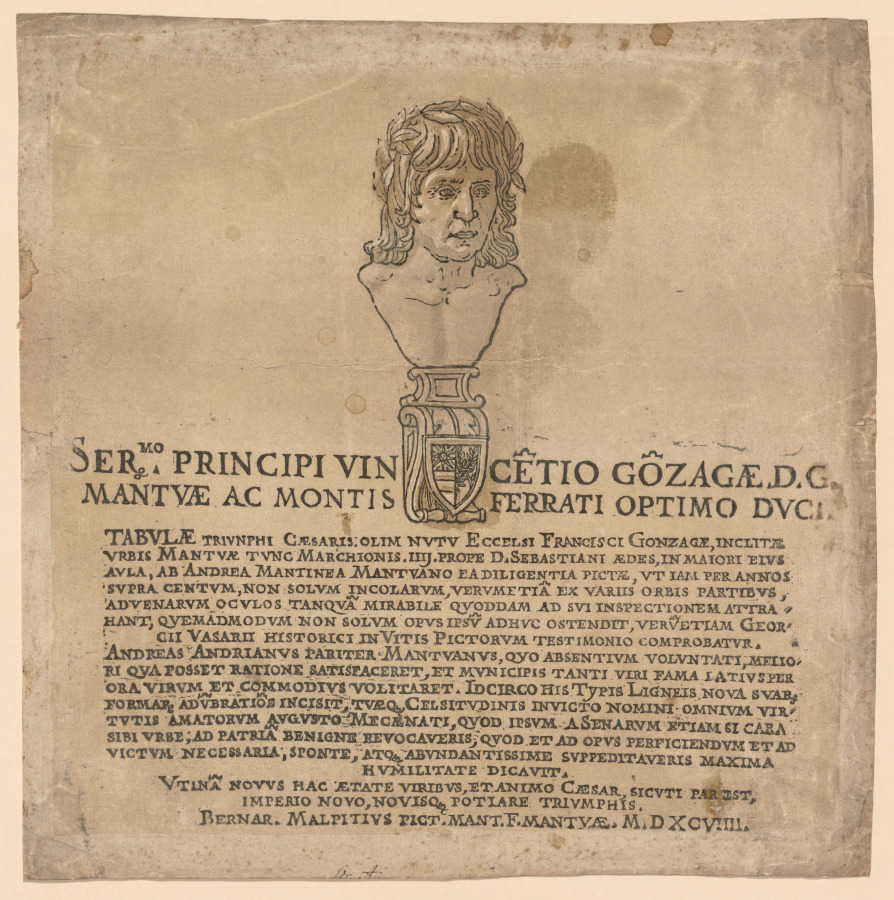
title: The Triumph of Julius Caesar: Frontispiece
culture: Italy, 16th century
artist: Andrea Andreani (Italian, about 1558–1610)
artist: after Andrea Mantegna (Italian, about 1431–1506)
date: 1593–99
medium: chiaroscuro woodcut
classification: Print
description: Commissioned by Duke Vincenzo Gonzaga, this series of chiaroscuro woodcuts reproduces Andrea Mantegna’s Triumph of Julius Caesar, painted a century earlier. The scenes imaginatively portray the triumphal procession of the renowned Roman general and consul Julius Caesar following his successful defeat of Gaul in 52 BC. Each section of the continuous frieze shows elements typical of these parades, sanctioned by the Roman Senate and described in ancient texts. The printed suite’s frontispiece features a portrait bust of Mantegna, and the text below boasts that the famous paintings attracted many viewers. People who owned sets of these woodcuts often tacked them up to create a decorative frieze. Andreani issued the prints with a sheet of classical columns that could be cut out and placed between the scenes. Two fragments of these columns, colored orange, still flank the fourth scene.